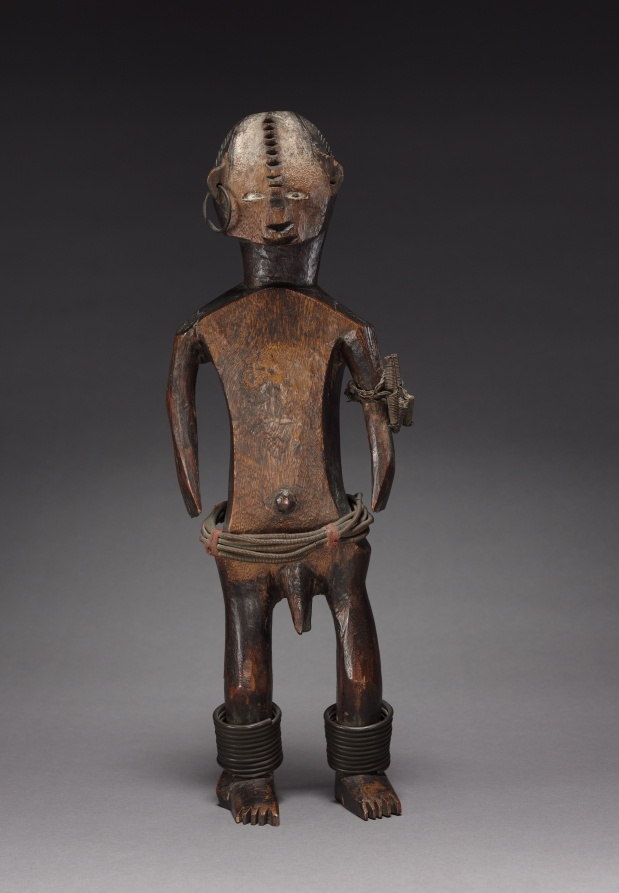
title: Male Figure of a Pair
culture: Africa, Central Africa, Democratic Republic of Congo, probably Ngbandi-style carver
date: late 1800s-early 1900s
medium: Wood, iron alloy, copper alloy, and cloth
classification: Sculpture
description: Carving of paired figures is quite well documented among the Ngbandi and its neighbors the Ngbaka-Minagende, where such sculptures are said to represent the mythical ancestor Seto and his sister-wife, Nabo. Field-based research cannot confirm the existence of figurative couples among the Ngbandi.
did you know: Odette Delenne, the collector of this pair, once stated that these figures reminded her of herself and her husband, René.